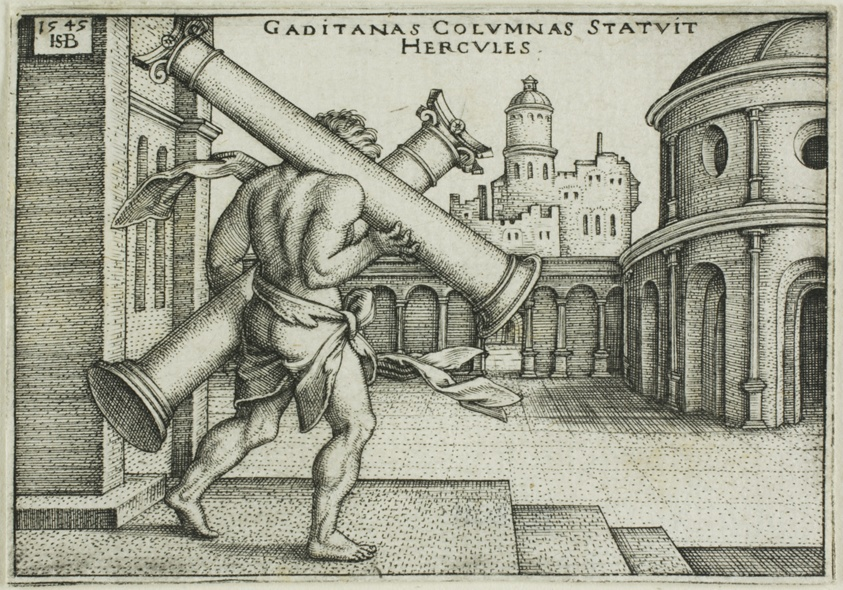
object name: Print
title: Hercules and Columns of Gaza, from The Labors of Hercules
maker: Sebald Beham; German, 1500-1550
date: 1545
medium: Engraving in black on ivory laid paper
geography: Germany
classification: engraving; print; prints and drawing